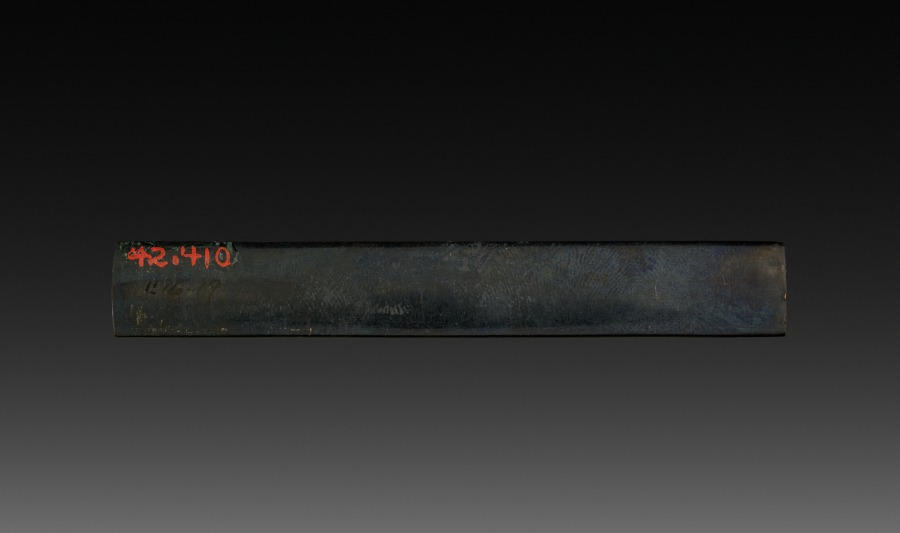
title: Knife Handle (Kozuka)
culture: Japan, Edo period (1615–1868)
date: early to mid-1800s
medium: inlaid bronze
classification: Metalwork